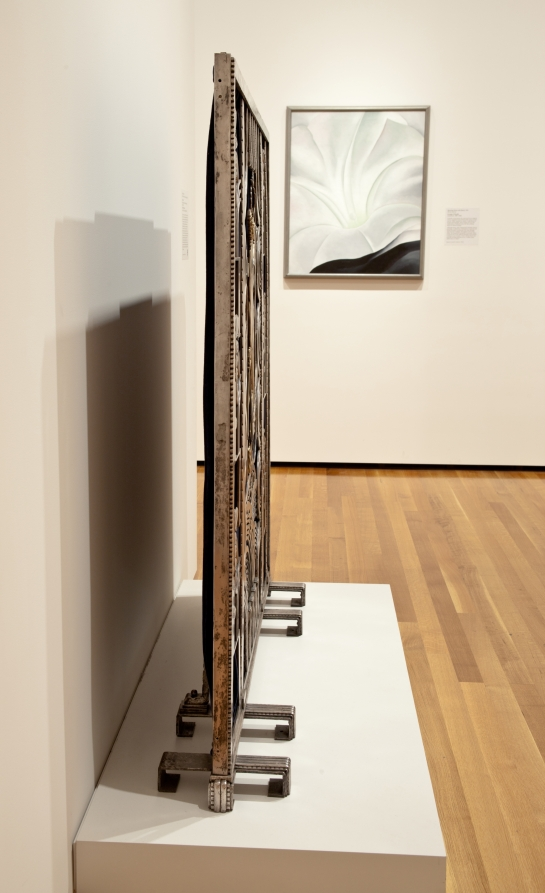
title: Muse with Violin Screen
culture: America, Ohio, Cleveland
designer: Paul Fehér (American, born Hungary, 1898–1990)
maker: Rose Iron Works (America, Ohio, Cleveland, est. 1904)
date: 1930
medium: Steel, brass; silver and gold plating, cotton velveteen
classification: Metalwork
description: Since the early years of the 20th century, the Rose Iron Works, a Cleveland supplier of architectural ornament, has produced distinguished metalwork. The company’s founder, Martin Rose, was born in Austria-Hungary and studied ornamental metalsmithing in Vienna prior to immigrating to Cleveland in 1902. In the 1920s, he hired a talented young Parisian designer, Paul Fehér, to work for the firm. Fehér’s designs, culminating in this massive screen, brought a modern European sensibility to the Rose Iron Works production. With its geometric patterning, highly stylized and abstracted natural forms, and the central figure reminiscent of the celebrated jazz singer Josephine Baker, this screen reflects the classic motifs of Art Deco design.